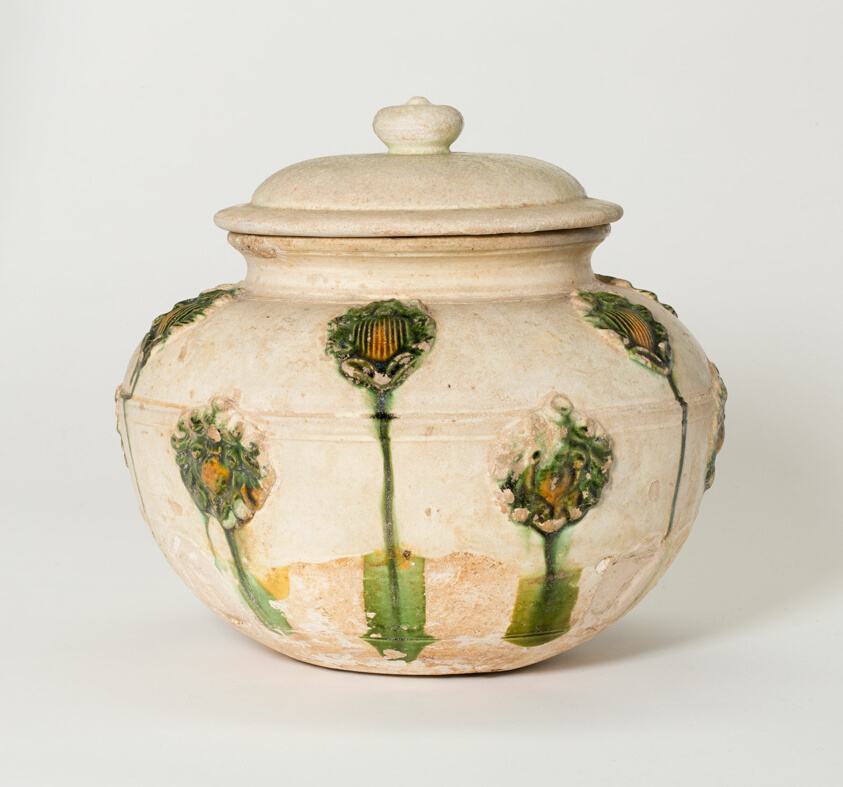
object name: Vessel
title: Covered Jar with Medallions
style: Chinese (culture or style)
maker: China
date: Tang dynasty (618–906)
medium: Slip-coated earthenware with three-color (sancai) lead glazes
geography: China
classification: ceramics; asian art; vessel